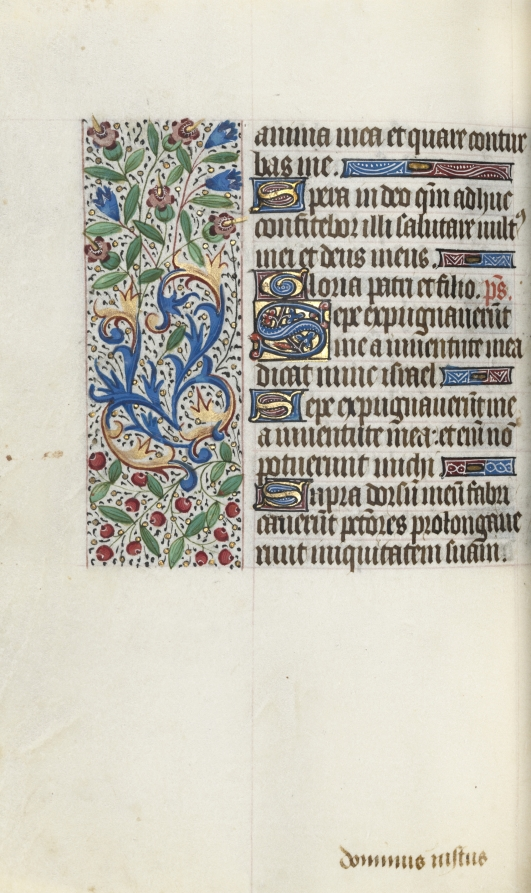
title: Book of Hours (Use of Rouen): fol. 76v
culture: France, Rouen, 15th century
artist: Master of the Geneva Latini (French, active Rouen, 1460–80)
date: c. 1470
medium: ink, tempera, and gold on vellum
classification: Bound Volume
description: In the late 1400s and early 1500s Rouen was an established and important center of book production. The city’s cathedral had a wealthy chapter that spent large sums of money to commission books and to maintain its extensive library. The stationers and booksellers would have likely been concentrated in or near the cathedral precinct. This artist, named after a manuscript now in Geneva, was Rouen’s principal illuminator during the second half of the 1400s.